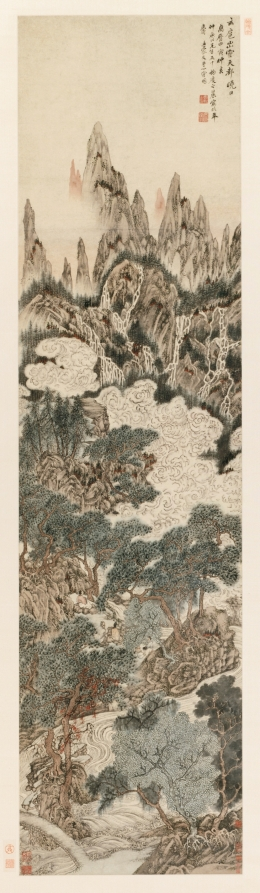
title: Morning Sun over Heavenly Citadel Peak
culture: China, Ming dynasty (1368–1644)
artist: Ding Yunpeng (Chinese, 1547-c. 1628)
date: 1614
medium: Hanging scroll; ink and light color on paper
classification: Painting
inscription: Artist's inscription, signature, and 2 seals: Clouds arise from the dale of the "Dark Plateau," The morning sun is over the peak of the Heavenly Citadel. In mid-spring of the chia-yen year of the Wan-li era [1614], painted as a fiftieth birthday present to Mr. Chung-lu. Junior Friend of Family Alliance, Ting Yün-p'eng [seals] Yün-p'eng chih yin; Ting Nan-yü.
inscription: 10 additional seals: 5 of Kao Hsiang-ling (dates unknown); 5 unidentified.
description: A birthday gift, this scroll by Ding Yunpeng from Anhui is among the earliest paintings of Mount Huang (Yellow Mountains), here depicting Heavenly Citadel Peak. The mountains are named after the legendary Yellow emperor who is said to have visited the place to look for the essence of immortality. Deep red strokes accentuate vegetation and allude to cinnabar, the alleged elixir of immortality. Difficult to climb and access, Mount Huang in Anhui province did not become a destination for hikers nor a subject for artists before the late Ming dynasty, when steps were built. Today its towering peaks are a national site and tourist attraction.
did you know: Mount Huang, known for its scenic beauty, is one of China's major tourist attractions.